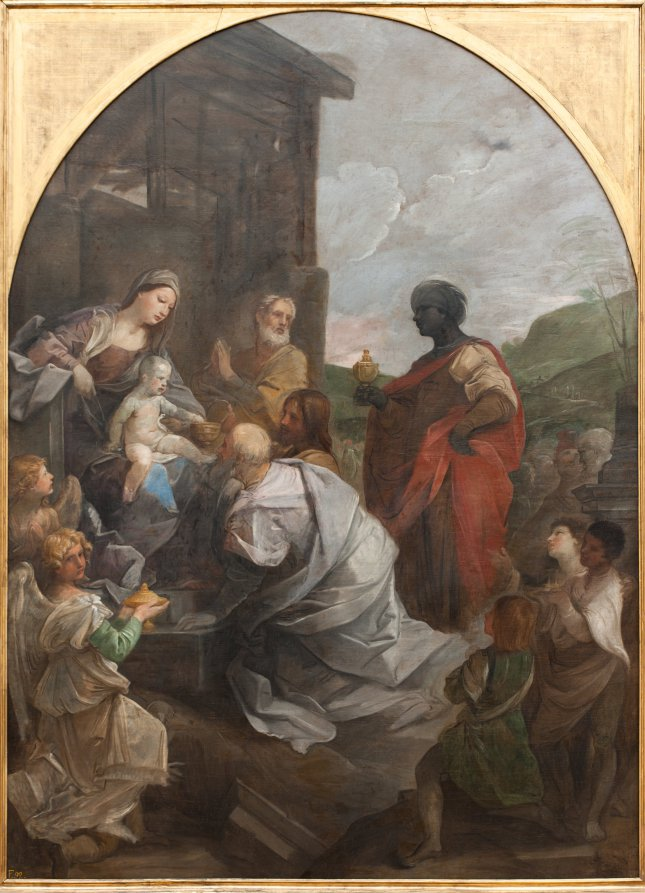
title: Adoration of the Magi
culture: Italy, 17th century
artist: Guido Reni (Italian, 1575–1642)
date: 1642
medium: oil on canvas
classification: Painting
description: This large altarpiece was in the artist's studio when he died, and parts of the composition appear incomplete. Some figures lack color, and Reni never finished the wooden structure. The silvery ground layer appears everywhere, as do his changes to the composition, such as the dog's head above the angel's right knee and the adjustment to Christ's right leg, covered in blue. However, Reni's death does not fully explain the unfinished quality. Toward the end of his career, he increasingly painted in a loose and sketchy manner—popular with collectors at the time—an approach implying that concrete forms could never depict the ideal, spiritual world Reni aimed to present.